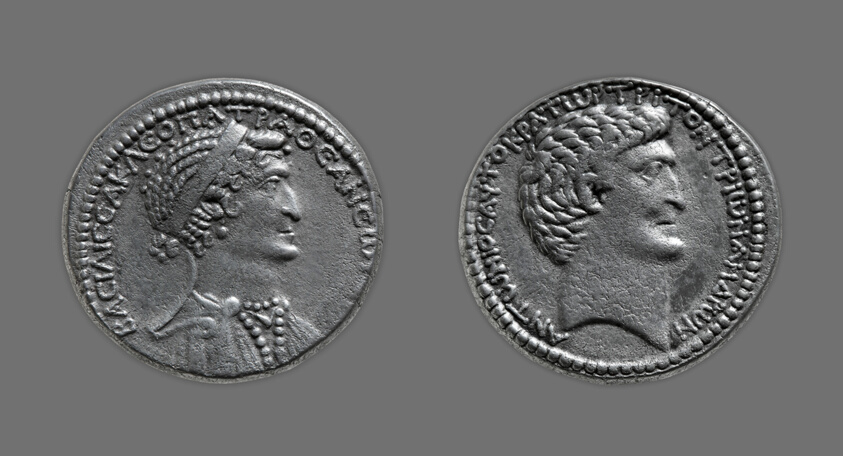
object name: Coin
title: Tetradrachm (Coin) Portraying Queen Cleopatra VII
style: greco-roman (egyptian), ancient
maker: Roman; minted in Eastern Mediterranean (possibly Antioch, Syria)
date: 37-33 BCE, issued by Mark Antony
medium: Silver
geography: Syria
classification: coin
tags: portraits, cleopatra, rulers (people)